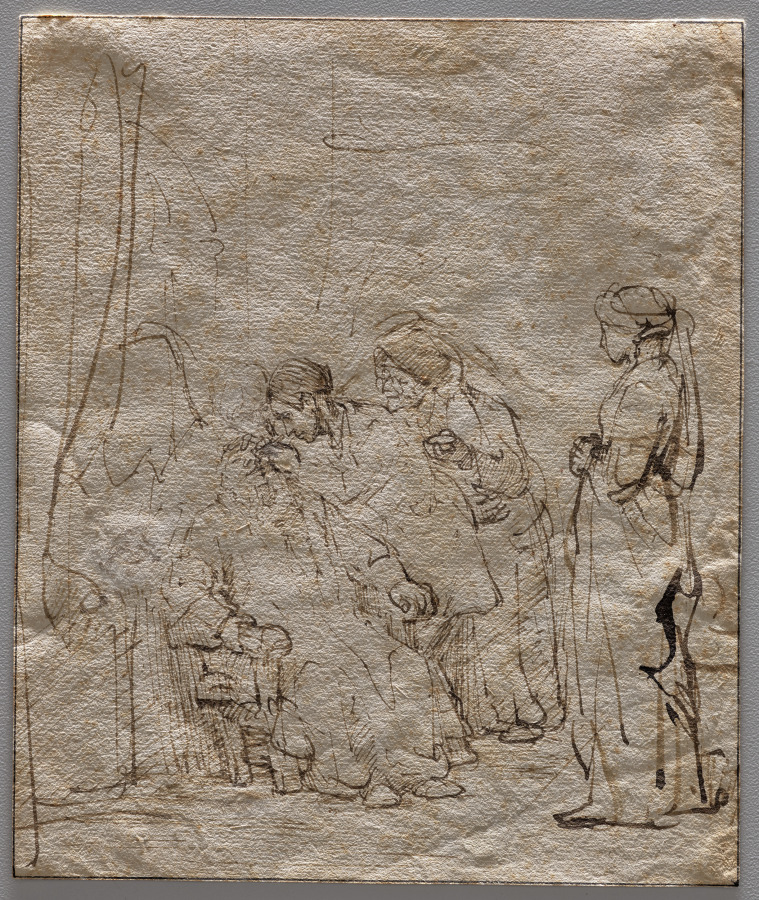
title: Tobias Healing His Father's Blindness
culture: Netherlands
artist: Rembrandt van Rijn (Dutch, 1606–1669)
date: c. 1640–45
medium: Pen and brown ink, touched with white gouache; framing lines in pen and brown ink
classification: Drawing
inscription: verso, upper center, in graphite: -13 [crossed out]; upper right, in black chalk: rembrant; upper right, in brown ink: D; upper center, in brown ink: [15-50?] / Tobias; upper left, in brown ink: 9 [sideways]; lower left, in brown ink: [illegible, cropped]; lower left, in brown ink: No 2910; lower left, in brown ink: Rembrandt; lower right, in brown ink: -d[l?]-13 [upside down]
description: This drawing is a prime example of the Dutch painter Rembrandt van Rijn's innovative approach to biblical narrative, in which he often humanized traditional pictorial formulas through the inclusion of observed details from everyday life. It depicts the climactic moment of the Book of Tobit, an apocryphal book of the Old Testament, in which, instructed by the archangel Raphael, Tobias heals his father Tobit's blindness by rubbing his eyes with fish gall. With spontaneity, a deft hand, and deceptive simplicity in his mark-making, Rembrandt depicts an intimate family scene including the archangel, Tobias, Hannah, and Sarah around a seated Tobit. Hannah’s spectacles, a unique detail among images of the scene created by Rembrandt and his circle, further thematizes sight. Rembrandt’s most innovative addition to the story centers on Tobias, who concentrates intensely to use a scalpel, rather than fish gall, to perform a cataract operation on his father’s left eye. Cataract surgery was a new procedure pioneered in Amsterdam in 1635 by Dr. Job Janszoon van Meekren, and Rembrandt may have witnessed the doctor perform it.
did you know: The seated figure in this drawing is receiving cataract surgery on his left eye, a procedure pioneered in Amsterdam in 1635 by Dr. Job Janszoon van Meekren.